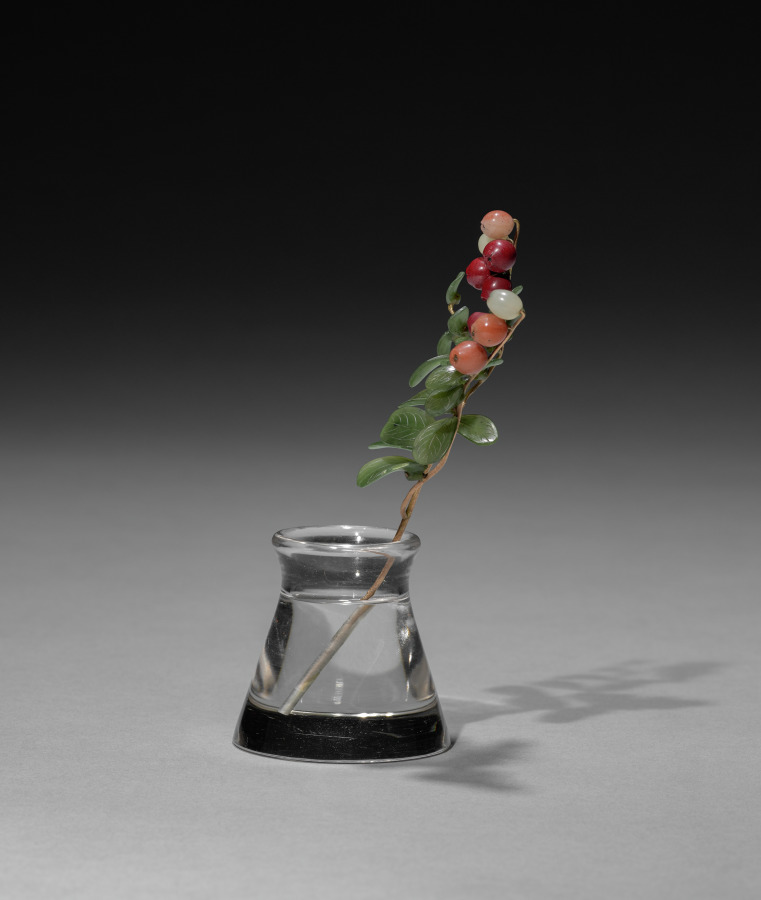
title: Flower Study of a Lowbush Cranberry or Lingonberry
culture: Russia, St. Petersburg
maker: House of Fabergé (Russian, 1842–1918)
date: c. 1885–1915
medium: chalcedony, jade, rock crystal, gold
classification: Miscellaneous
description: This flower study depicts a lowbush cranberry or lingonberry. To achieve a naturalistic effect of ripening fruit, Fabergé varied the coloring of the berries. Some are made of chalcedony in hues of milky white to represent unripe berries, while others appear in deep reddish agate to represent ripe ones. Fabergé’s inspiration for his flower studies is said to have come from the floral brooches of precious stones that were made in the 1700s for Catherine the Great as well as from the Japanese art of flower arranging, known as ikebana. Fabergé’s flower studies were given as intimate gifts to friends by the tsarina and others in the court. She also liked to take them around to wherever the imperial family was residing as a reminder of spring during the harsh Russian winters.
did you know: The stems of Fabergé’s flower studies are set into little basins carved from rock crystal to resemble pots of water.